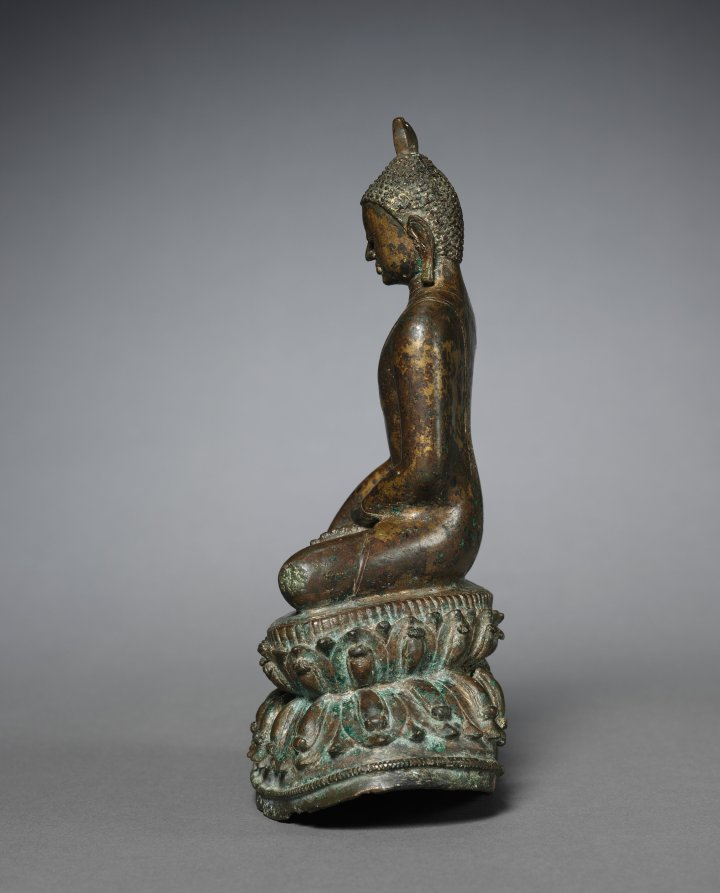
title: Sakyamuni Buddha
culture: Burma, Pagan style, 12th century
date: 1100s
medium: bronze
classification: Sculpture